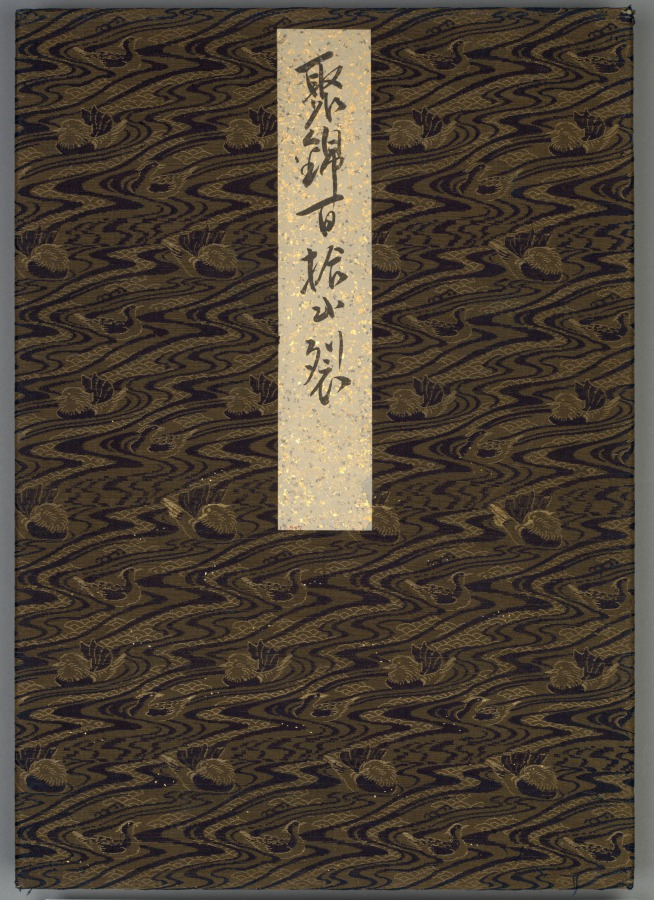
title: Album of Textile Samples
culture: Japan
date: 1790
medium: silk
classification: Textile